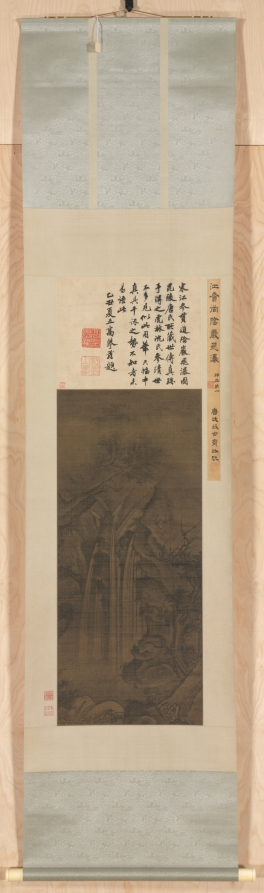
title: Waterfall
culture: China, Song dynasty (960-1279) - Yuan dynasty (1271-1368)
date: 1271–1368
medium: hanging scroll, ink and slight color on silk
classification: Painting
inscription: Label on the mounting with 2 seals of T'ang ? of Pi-ling (16th c.); label on back of mounting of Kü Kuang-hsü (1731-1797). 1 colophon and 8 additional seals: 1 colophon, dated 1625, and 2 seals of Kao P'an-lung (1562-1626); 2 seals of Liu Shu (1759-1816); 1 seal of Pi Lung (late 18th c.); 1 seal of Ts'ao tzu-wen; 2 seals unidentified. WKH